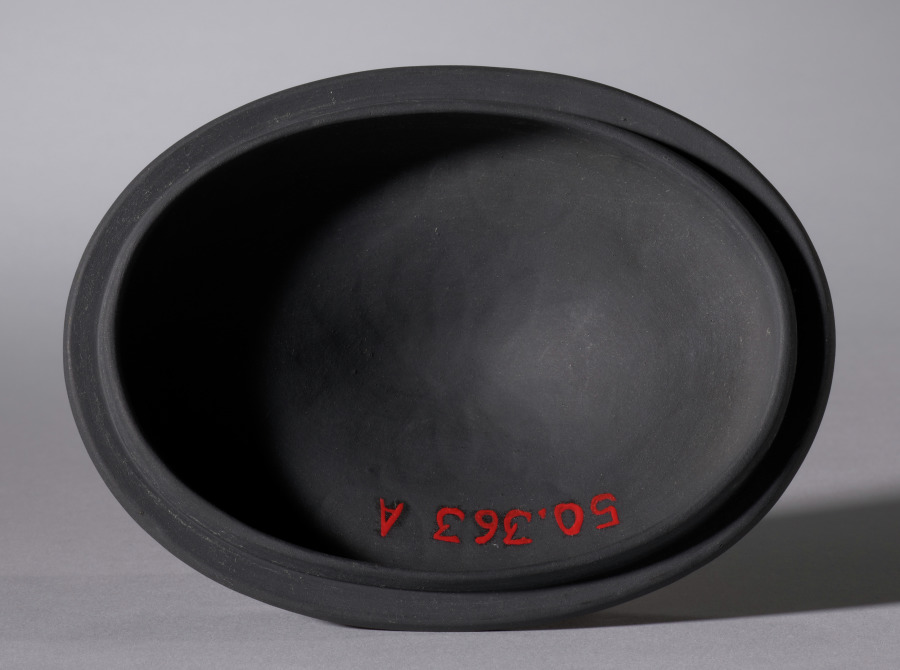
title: Teapot (cover)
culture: England, 19th century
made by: Elijah Mayer (British, c. 1770–1805)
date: c. 1810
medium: black basalt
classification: Ceramic